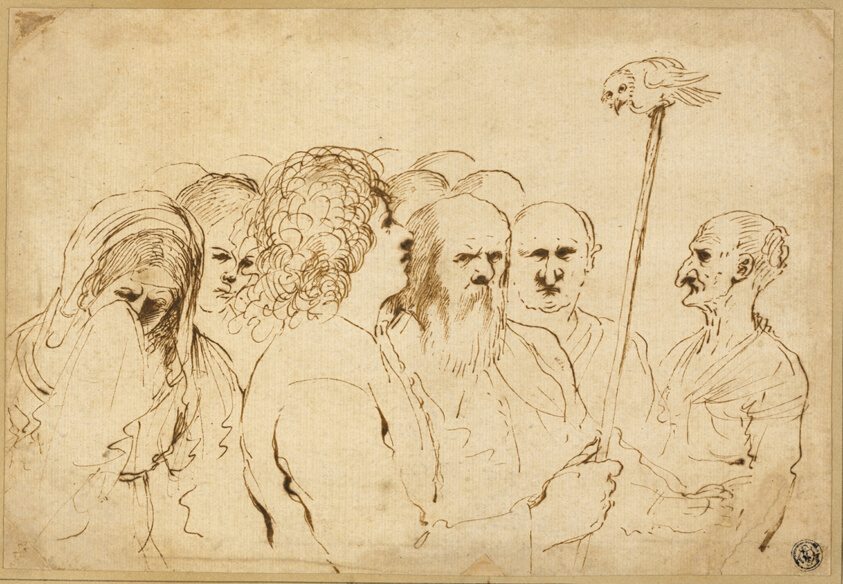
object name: Drawing and Watercolor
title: Group of Figures, with Owl on a Pole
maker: Attributed to Guercino; Italian 1591-1666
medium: Pen and brown ink on ivory laid paper, laid down on tan wove card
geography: Italy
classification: pen and ink drawings; drawings (visual works); prints and drawing